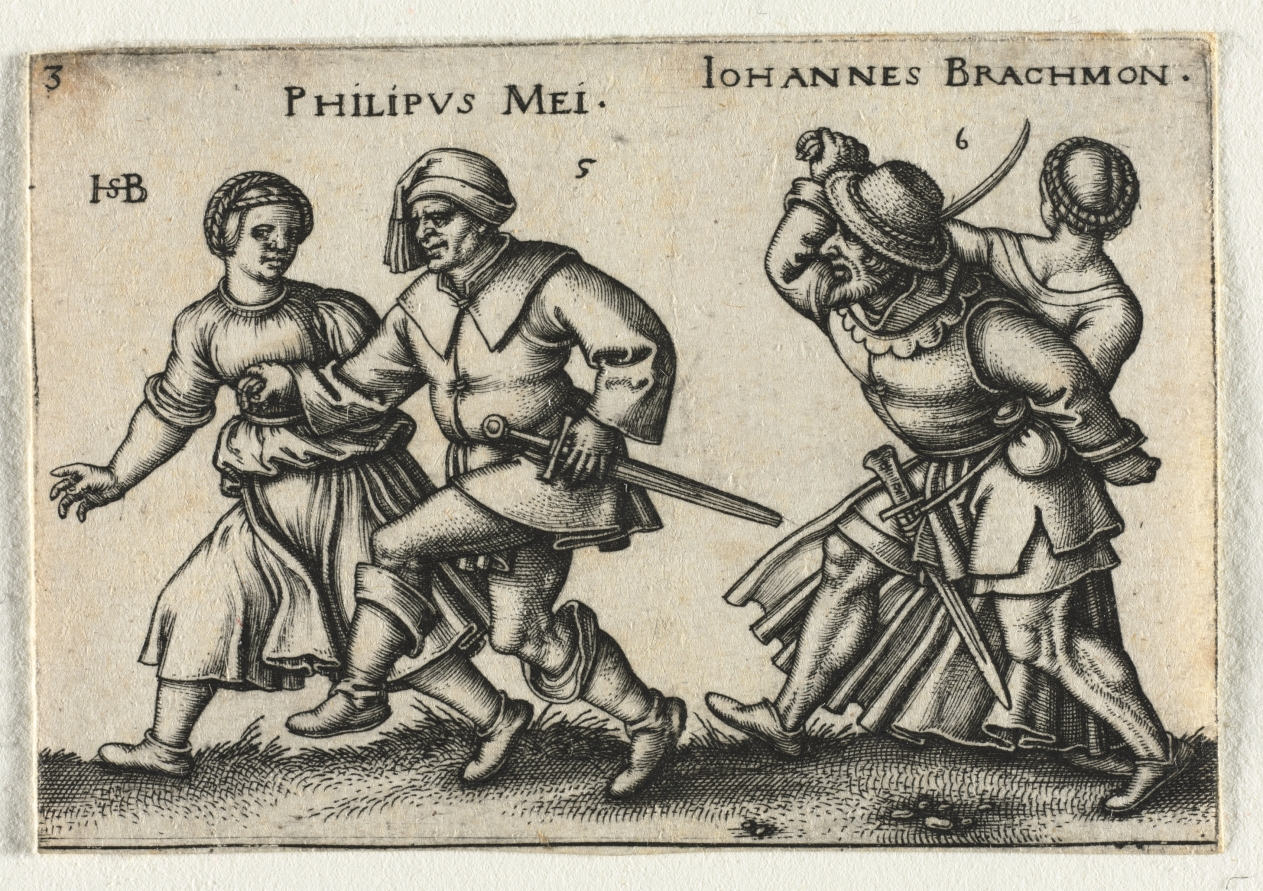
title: The Peasant Wedding or the Twelve Months: 5-Philipus Mei 6-Johannes Brachmon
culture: Germany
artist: Hans Sebald Beham (German, 1500–1550)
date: 1546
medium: engraving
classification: Print